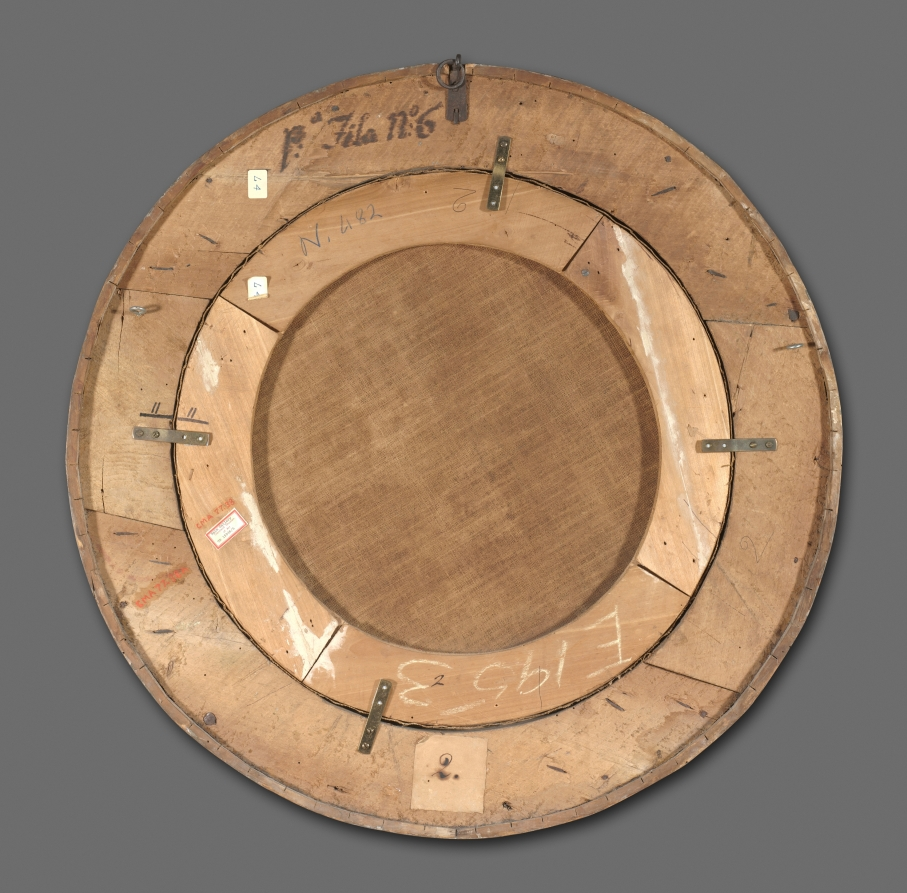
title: Scenes of Witchcraft: Evening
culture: Italy, 17th century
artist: Salvator Rosa (Italian, 1615–1673)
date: c. 1645–49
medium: oil on canvas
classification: Painting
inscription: Signed: "SR [monogram]"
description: At dusk, Rosa's hags gather around a cauldron. Above their incantations soars a conjured skeleton holding an hourglass symbolizing the brevity of life. In its left hand, the demonic creature holds a capital letter A from which extends a plumb line; as ancient signs of the moon and judgment, this strange combination of symbols embodies the nocturnal judgment the witches are doling out below. Though more rare in paint, the detailed portrayal of witches at their spells enjoyed a long literary tradition. The wax effigy alludes to classical literature by Virgil and Horace that described love magic. Poets in the 1500s and 1600s continued the tradition, writing verse about witches concocting potions and performing love spells. In Rosa's own poem "La Strega (The Witch)," the jilted Phyllis vows to take revenge on her feeble lover, listing the ingredients for her black magic: "ground powders, mystic gems, snakes and owls, stinking blood. . . ." Painting was considered "mute poetry" in the 1600s, and Rosa often explored the same themes in his written and painted art—a clever way to gain fame as a unique intellect.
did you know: The artist chose the painting's shape to reference the foundational role of the circle in practicing magic.